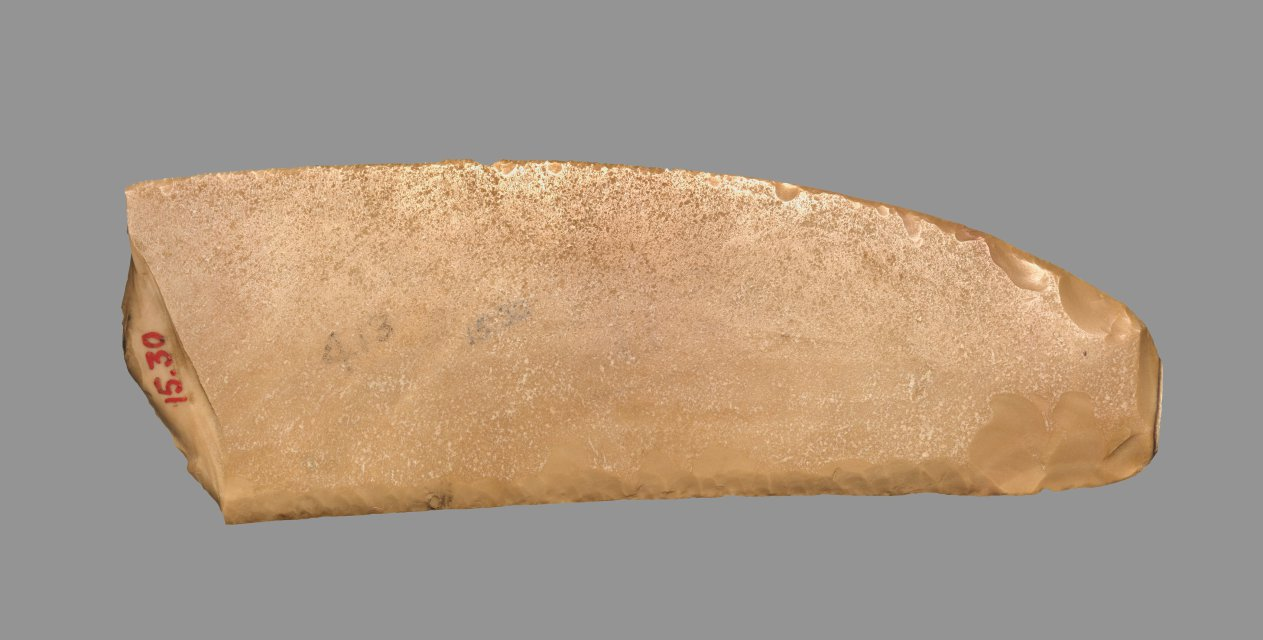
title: Ripple-Flaked Knife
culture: Egypt, Haraga, cemetery G, tomb 413, excavated in 1914, Predynastic (5000–2950 BCE), Naqada IIc–IIId (3650–3000 BCE)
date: 4000–3000 BCE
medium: flint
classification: Implements